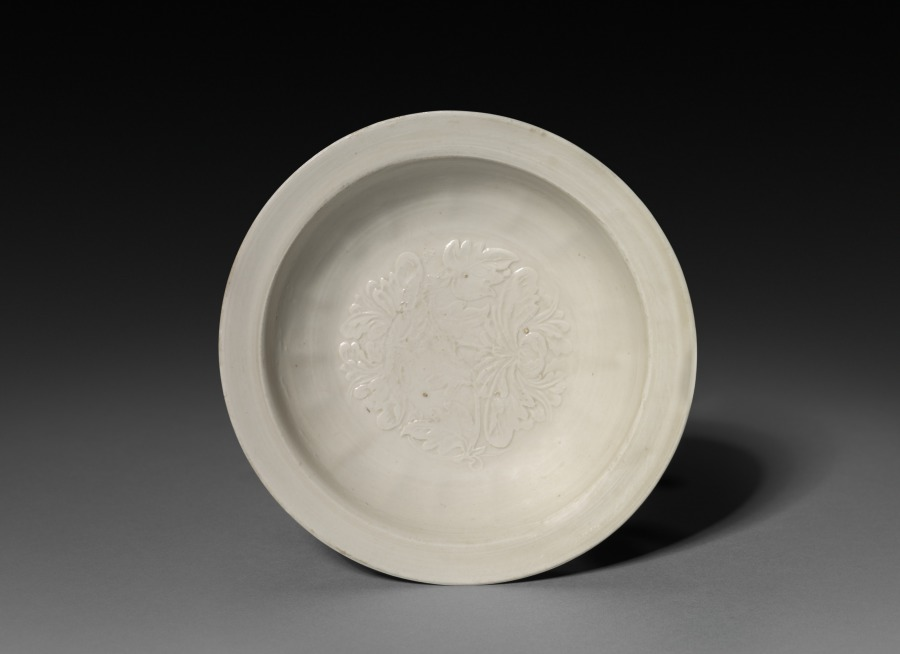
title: Circular Dish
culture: China, possibly Liao Kingdom, Northern Song dynasty (960-1127)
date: 12th Century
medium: white porcelain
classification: Ceramic